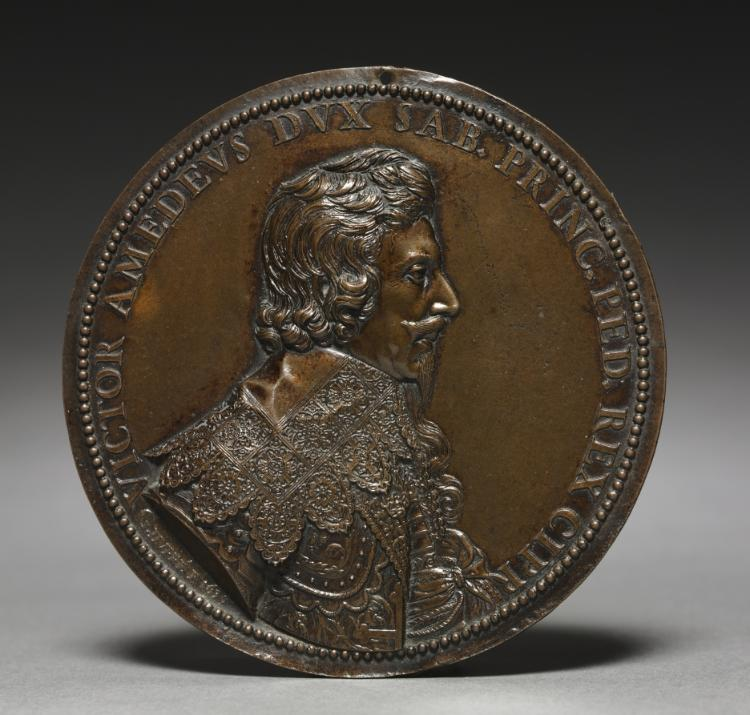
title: Portrait of Victor Amedeus of Savoy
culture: France, 17th century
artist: Guillaume Dupré (French, 1576–1643)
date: 1636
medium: bronze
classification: Sculpture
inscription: inscribed: VICTOR AMADEUS DUX SAB.PRINC.PED.REX CIPR/G.DVPRE F 1636.